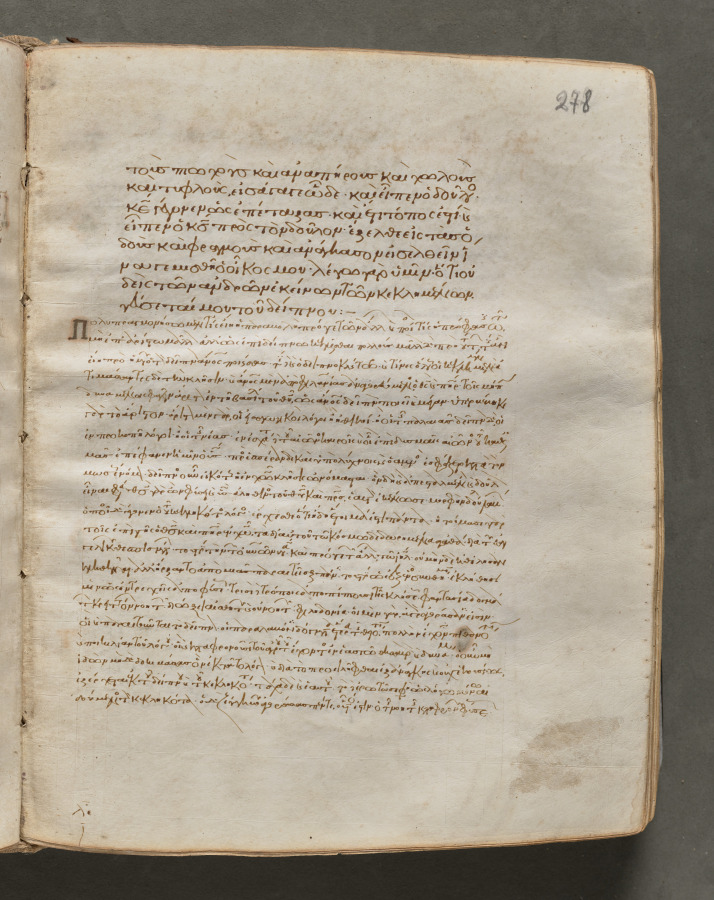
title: Text, folio 278 (recto), from a Gospel Book with Commentaries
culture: Byzantium, Constantinople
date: c. 1000–1100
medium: ink, tempera, and gold on vellum; leather binding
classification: Bound Volume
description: Each of the four gospels in this book opens on a page with brilliantly illuminated borders depicting the author of the text as well as birds—principally peacocks, symbols of the immortality of the soul—and fountains, representing the fountain of life and the salvation of the soul. This volume consists of 428 leaves with texts in Greek. Its level of sophistication suggests that it was probably written and decorated in a monastery in Constantinople.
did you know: Gospel books were carried in procession through Byzantine churches.